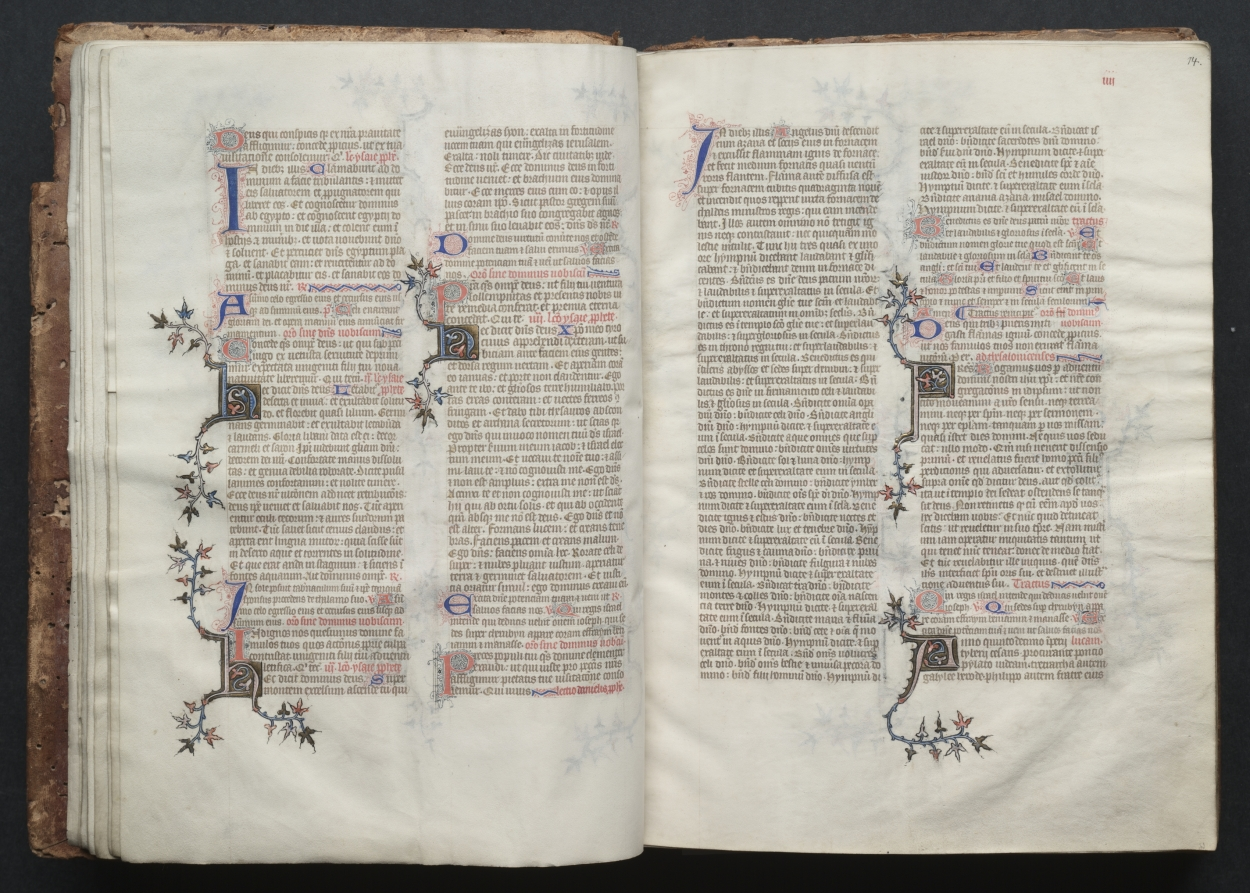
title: The Gotha Missal: Fol. 14r, Text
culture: France, Paris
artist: Master of the Boqueteaux (French)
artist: and Workshop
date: c. 1375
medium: ink, tempera, and gold on vellum; blind-tooled leather binding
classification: Bound Volume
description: The style and quality of this manuscript's decoration is typical of deluxe Parisian books made for aristocratic or royal patrons. Most of the book's decoration appears to be the work of the Master of the Boqueteaux, an artist active at the court of King Charles V (died 1380). His style was apparently shared by a number of book illuminators working in and around Paris. It is very possible that the Gotha Missal belonged to Charles V, but is not provable because the manuscript has no royal portraits and lacks a colophon. Given the book's magnificent decoration, however, it would seem that it was produced for a Valois prince, if not for the king himself. The manuscript receives its name from the German dukes of Gotha, its later owners.